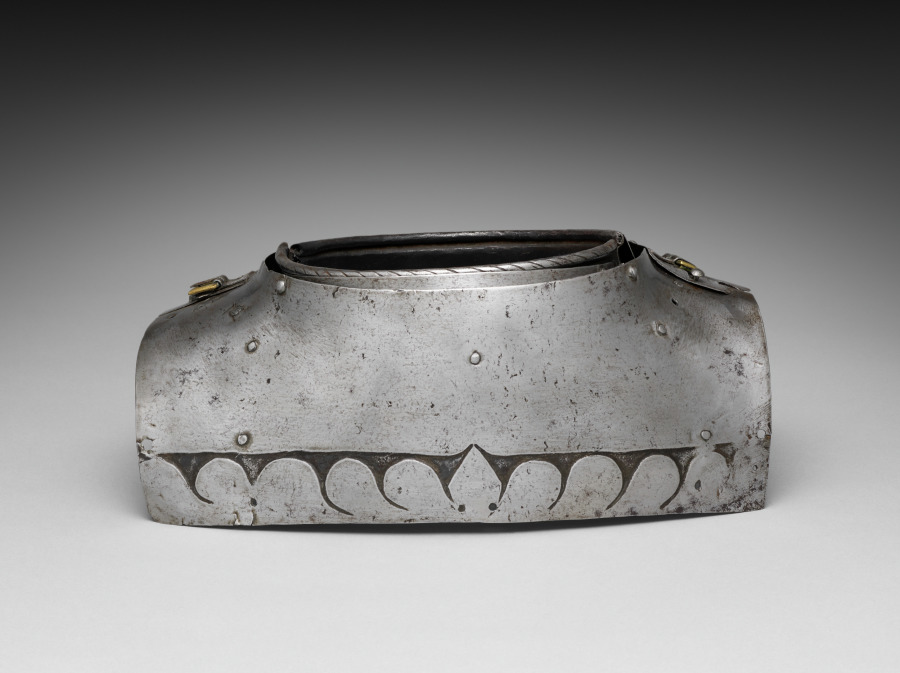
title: Gorget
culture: Germany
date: 1500s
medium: steel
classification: Arms and Armor